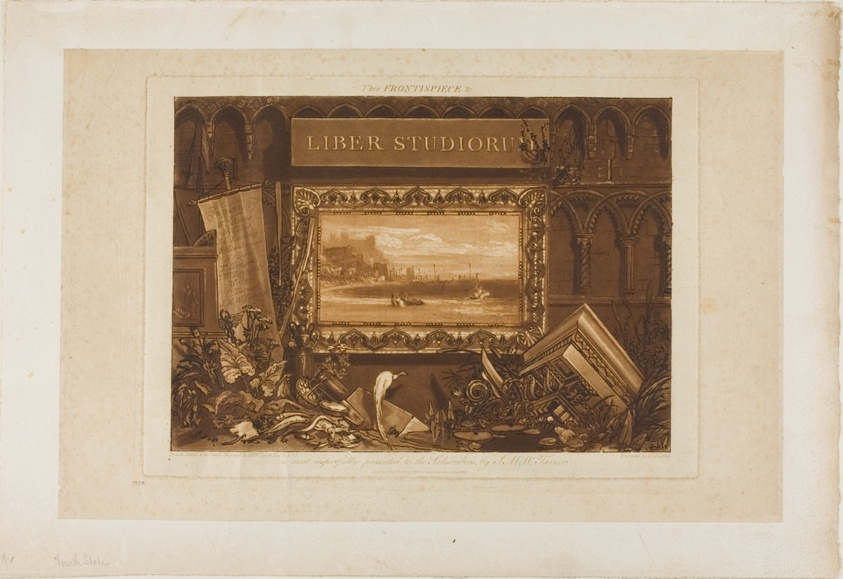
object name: Print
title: The Frontispiece to Liber Studiorum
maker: Joseph Mallord William Turner (English, 1775-1851); border engraved by Easling, J.C. (British, active 19th cen.)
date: published May 23, 1812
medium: Mezzotint and etching in dark brown on cream laid paper, lined at edges with ivory wove paper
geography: England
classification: etching; print; prints and drawing